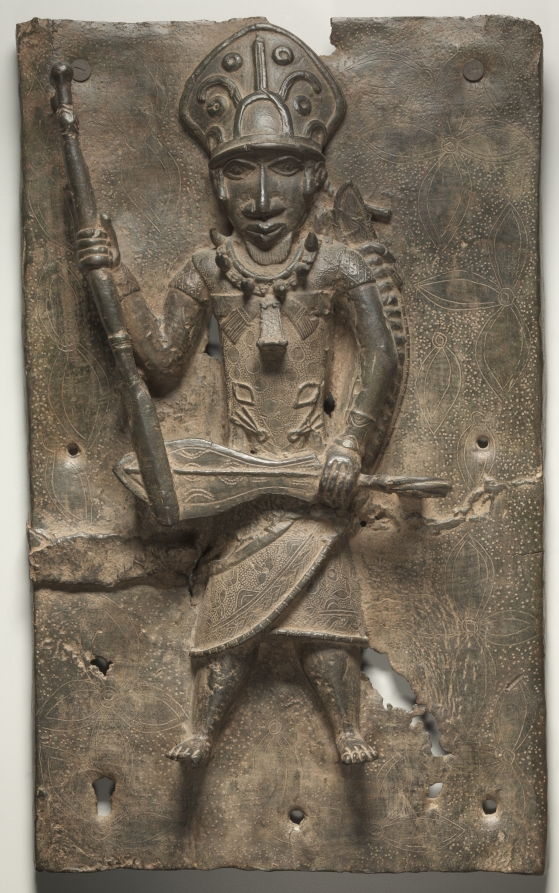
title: Plaque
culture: Nigeria, Benin Kingdom, Ẹdo peoples, members of the Igun Eronmwon (royal brasscasters) guild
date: 1500s–1600s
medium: Copper alloy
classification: Sculpture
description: Craftsmen modeled brass plaques like this in wax before casting them with hot metal. Molds pushed out figures’ general shapes, then details—such as this warrior’s staff and court sword (ẹbẹn)—were added by hand. Reflecting Benin’s global connections, the incised flowers may have Islamic or European origins. Called ebe-amẹn (river leaves) they are identified with Olókun, god of the waters. The interlaced side motifs may connect several early plaques also linked by topic and style. The palace plaques were in storage before the 1897 Siege of Benin. Recently, an art historian virtually reconstructed their former display in the palace based on their dimensions and imagery.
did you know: The bent sides of this plaque once helped attach it to wooden beams in a palace.